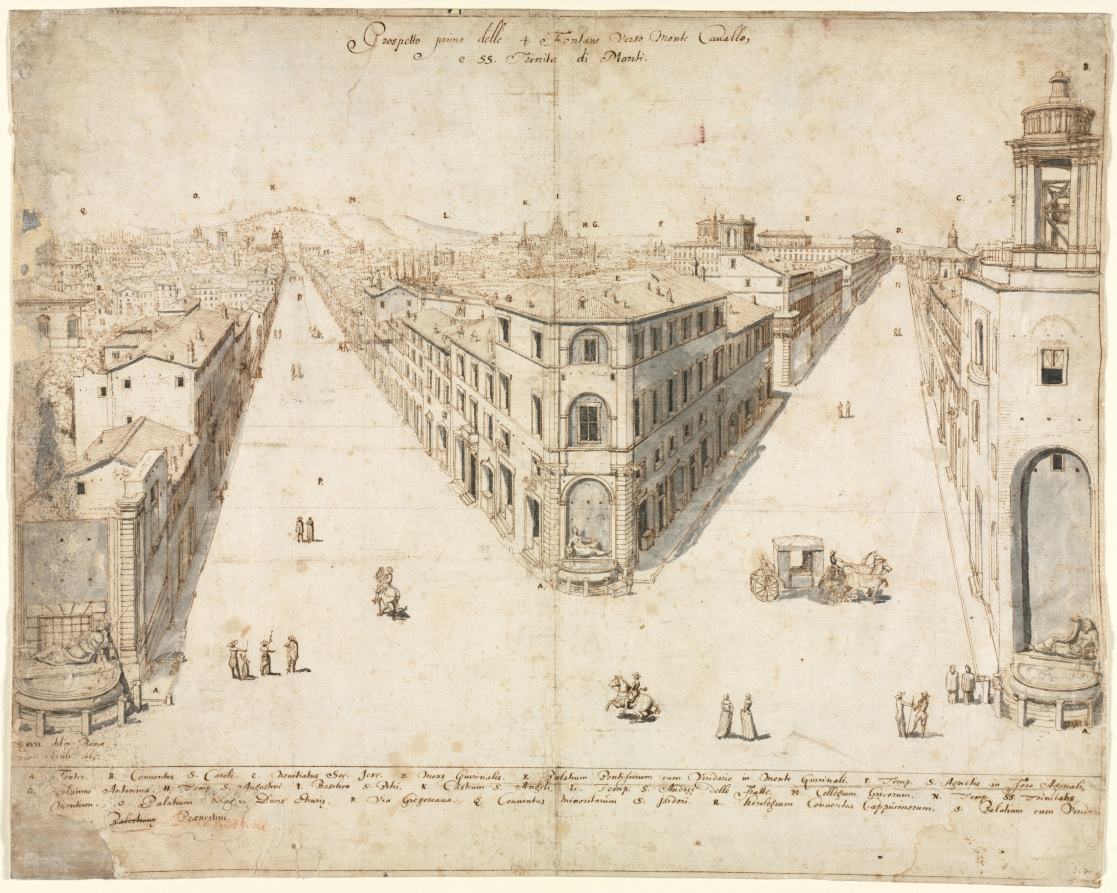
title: Eighteen Views of Rome: The Quattro Fontane Looking Toward Monte Cavallo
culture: Flanders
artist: Lievin Cruyl (Flemish, c. 1640-c. 1720)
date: 1665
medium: pen and brown ink and brush and gray wash over graphite; framing lines in brown ink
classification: Drawing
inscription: signed, lower left, in brown ink: [artist's monogram: LC] RVYL delin: Romæ / mense Aprili 1665. ; by artist, upper center, in brown ink: Prospetto primo delle 4. Fontane Verso Monte Cavallo, / e SS. Trinita di Monti ; by artist, throughout composition, in brown ink: [the letters A-R] ; by artist, across bottom, in brown ink: A. Fontes. B. Conventus S. Caroli. C. Novitiatus Soc. Jesv. D. Mons Quirnalis. E. Palatium Pontificium cum Viridario in Monte Quirinali. F. Temp. S. Agnetis in Foso Agonali. / G. Columna Antonina. H. Temp. S. Augustini. I. Basilica S. Petri. K. Castrum. S. Angeli. L. Temp. S. Andreæ delle Fratte. M. Collegium Grecorum. N. Temp. SS. Trinitatis / Montium. O. Palatium Mag[ni] Ducis Etruriæ. P. Via Gregoriana. Q. Conventus Minoritariúm S. Isidori. R. Horologium Conventus Cappúcinorum. S. Palatium cum Virida[r]io / [portion missing] Palestrinæ[crossed out] Praenestini [in red chalk] Prænestini. [in brown ink, rewitten over inscription in red chalk] ; ON STRIPS OF PAPER MOUNTED TO VERSO, bottom center, in graphite: A20983 ; lower right, in graphite: E. 20 ; ON PIECE OF PAPER APPLIED TO VERSO AS A REPAIR, lower right, in graphite: [four lines of illegible inscription] [upside down]